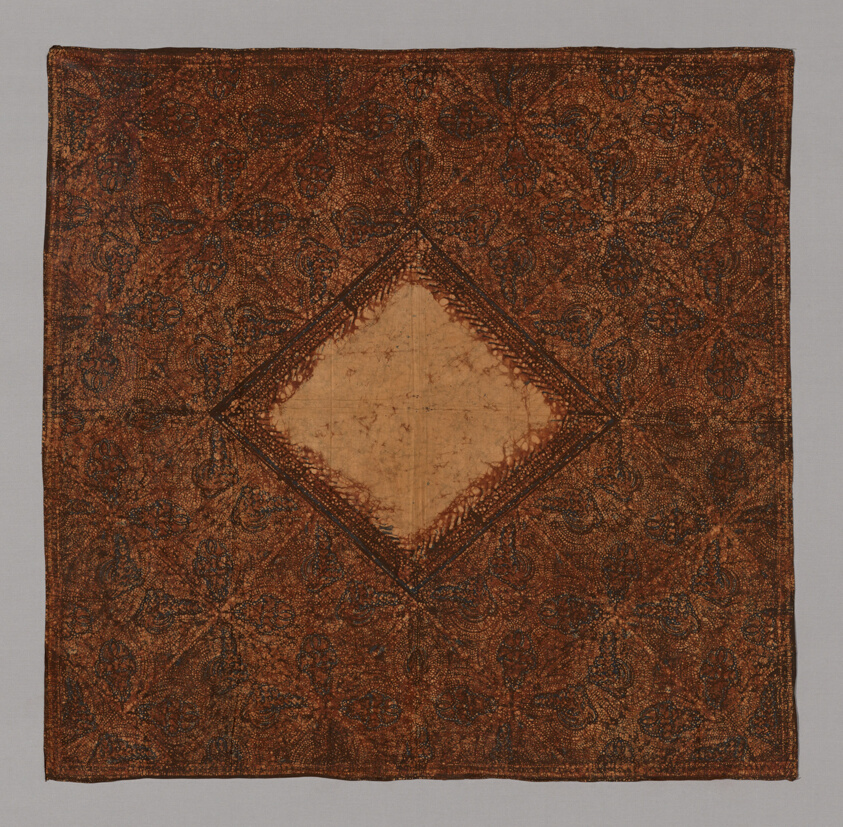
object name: Textile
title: Square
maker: Indonesia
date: 19th century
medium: Cotton; batik dyed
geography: Indonesia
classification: textile; weaving - printed; costume